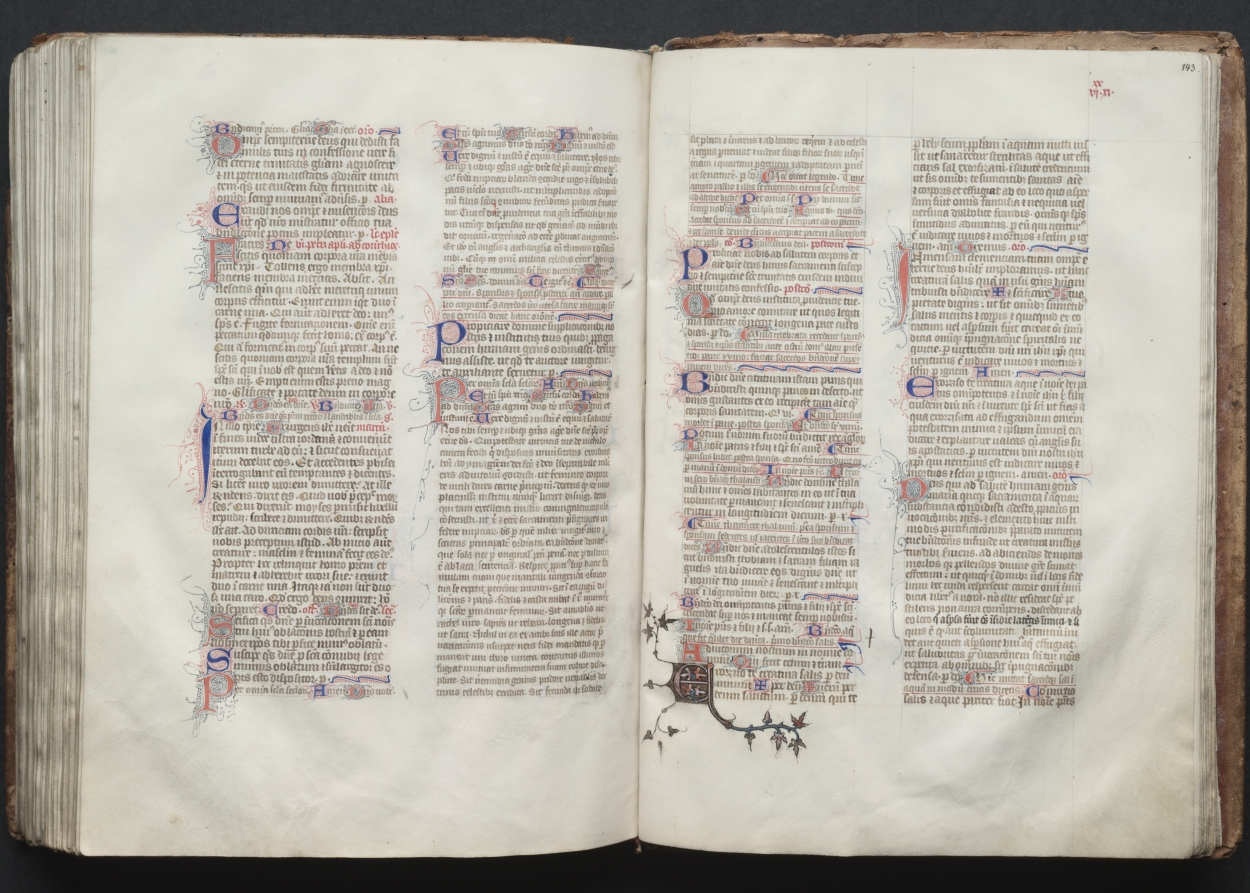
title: The Gotha Missal: Fol. 143r, Text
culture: France, Paris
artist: Master of the Boqueteaux (French)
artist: and Workshop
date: c. 1375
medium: ink, tempera, and gold on vellum; blind-tooled leather binding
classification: Bound Volume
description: The style and quality of this manuscript's decoration is typical of deluxe Parisian books made for aristocratic or royal patrons. Most of the book's decoration appears to be the work of the Master of the Boqueteaux, an artist active at the court of King Charles V (died 1380). His style was apparently shared by a number of book illuminators working in and around Paris. It is very possible that the Gotha Missal belonged to Charles V, but is not provable because the manuscript has no royal portraits and lacks a colophon. Given the book's magnificent decoration, however, it would seem that it was produced for a Valois prince, if not for the king himself. The manuscript receives its name from the German dukes of Gotha, its later owners.